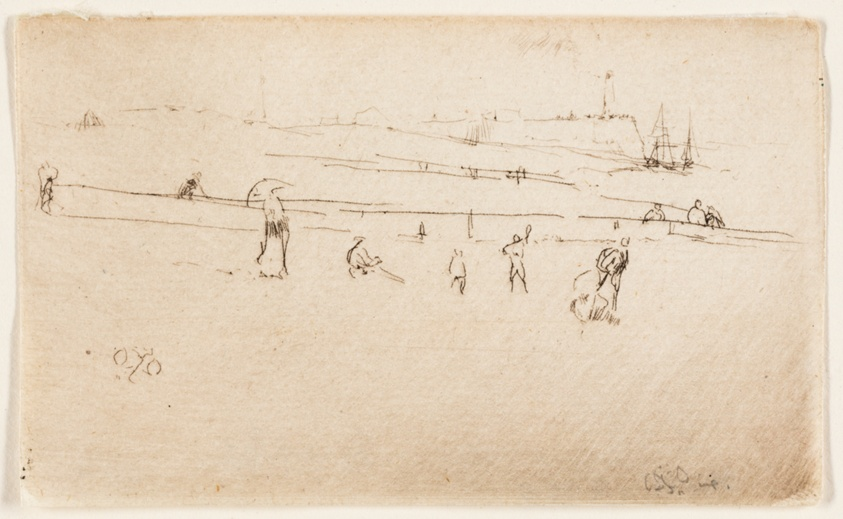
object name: Print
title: Dieppe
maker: James McNeill Whistler (American, 1834-1903)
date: 1885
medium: Etching and drypoint in black ink on ivory laid paper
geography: United States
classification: etching; print; prints and drawing; paper; drypoint